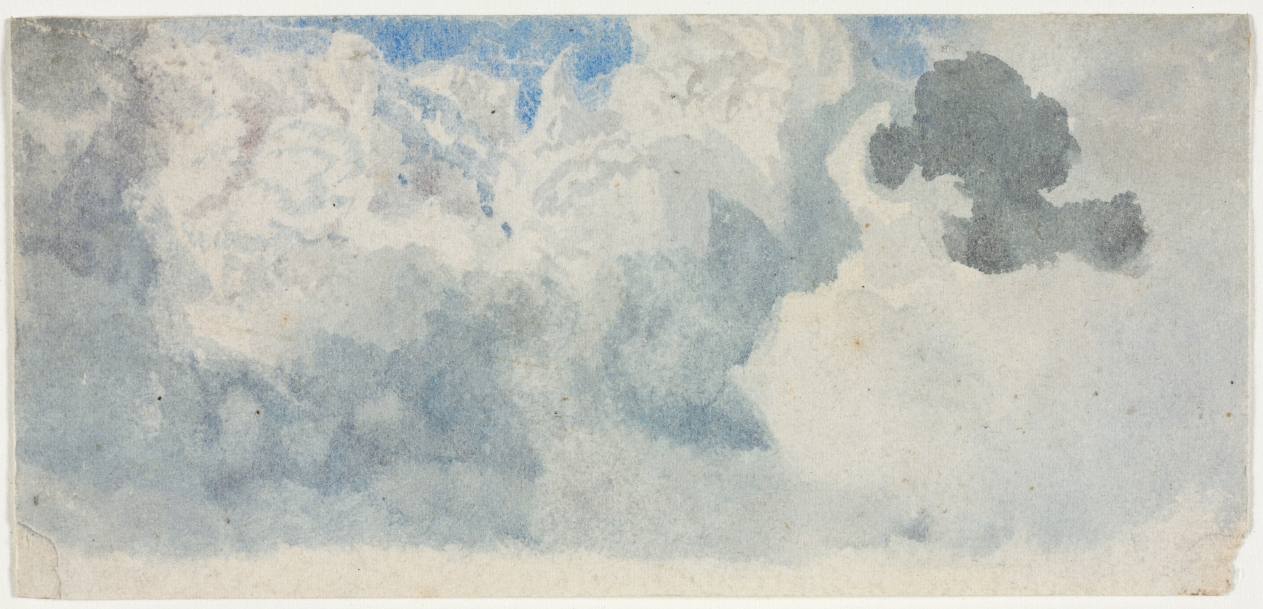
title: Cloud Study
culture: England, 19th century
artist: Anonymous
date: 1800s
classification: Drawing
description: Many English watercolorists of the period were especially interested in capturing natural effects of the landscape, such as cloud formations. Such studies were of particular interest to the French Impressionists.